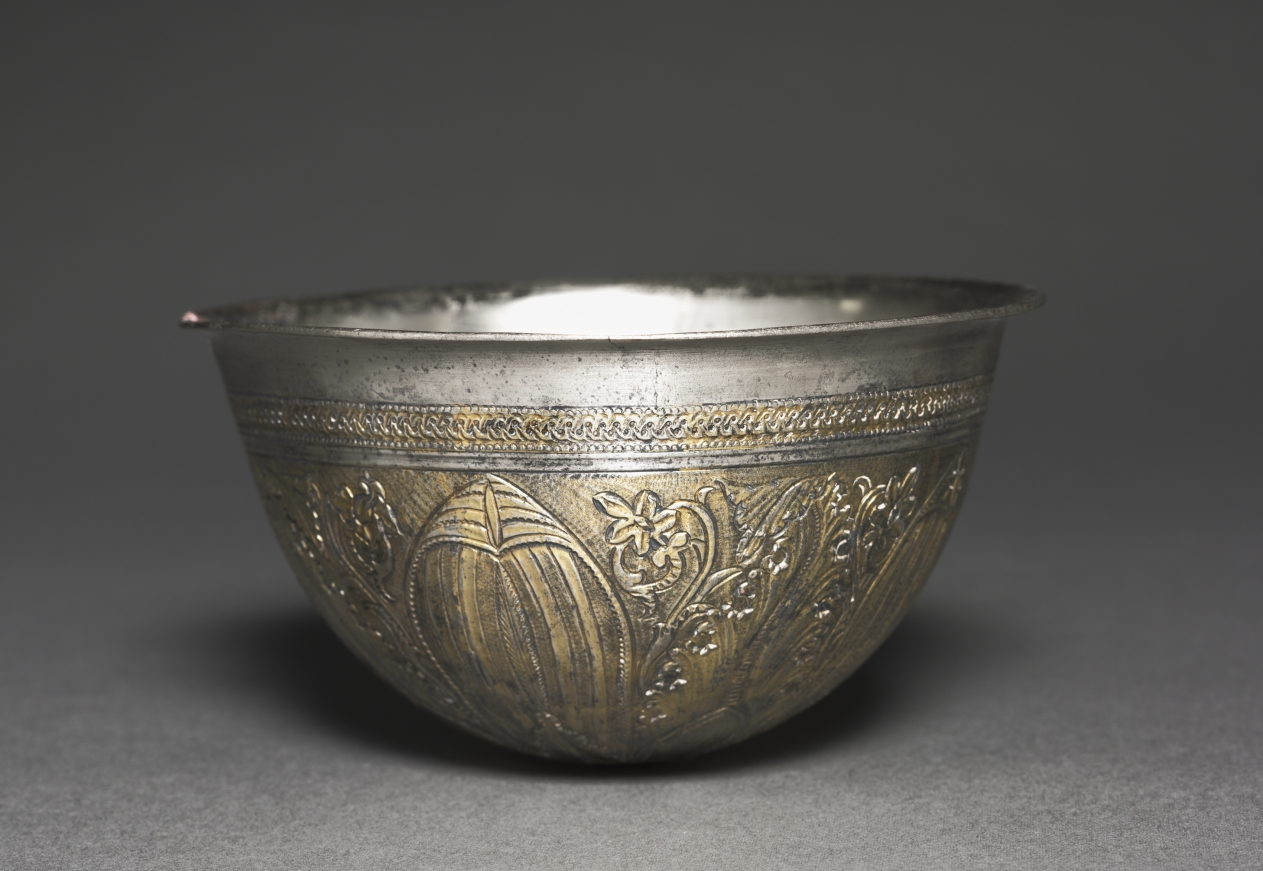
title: Bowl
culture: Greece, late Hellenistic period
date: 200–1 BCE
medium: silver gilt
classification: Metalwork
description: The exterior surface of this silver bowl is lavishly decorated with floral motifs. The bottom of the bowl is decorated with a floral design based on the lotus blossom, a popular motif in ancient Greece and Egypt. More petals and leaves radiate outward, alternating between water lily petals and acanthus leaves. Tendrils and blossoms fill the open spaces between the floral designs.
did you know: Silver-gilt, a technique of layering a thin layer of gold over silver, was used to decorate this bowl.